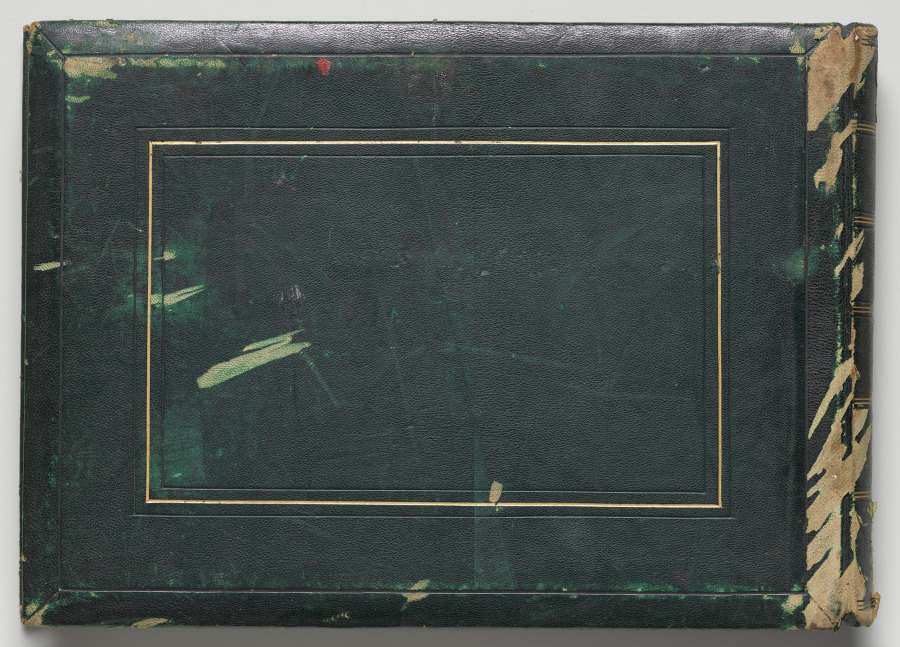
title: 46 Photographs from an Album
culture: India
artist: Raja Deen Dayal (Indian, 1844–1905)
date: c. 1882–87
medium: 46 albumen prints on 26 sheets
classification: Bound Volume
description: These photographs are part of an album, now disassembled, of around 105 photographs taken in India between 1885 and summer 1887 that provide glimpses into the lives of the British colonial elite and royal and upper-class Indians. The museum holds another group of 37 pictures from this album (2016.266), which was probably commissioned by a British civil servant visiting or working in India around 1888 as a personal souvenir of his experiences there.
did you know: Raja Deen Dayal is regarded now, and was considered during his lifetime, to be India’s most important 19th century photographer.